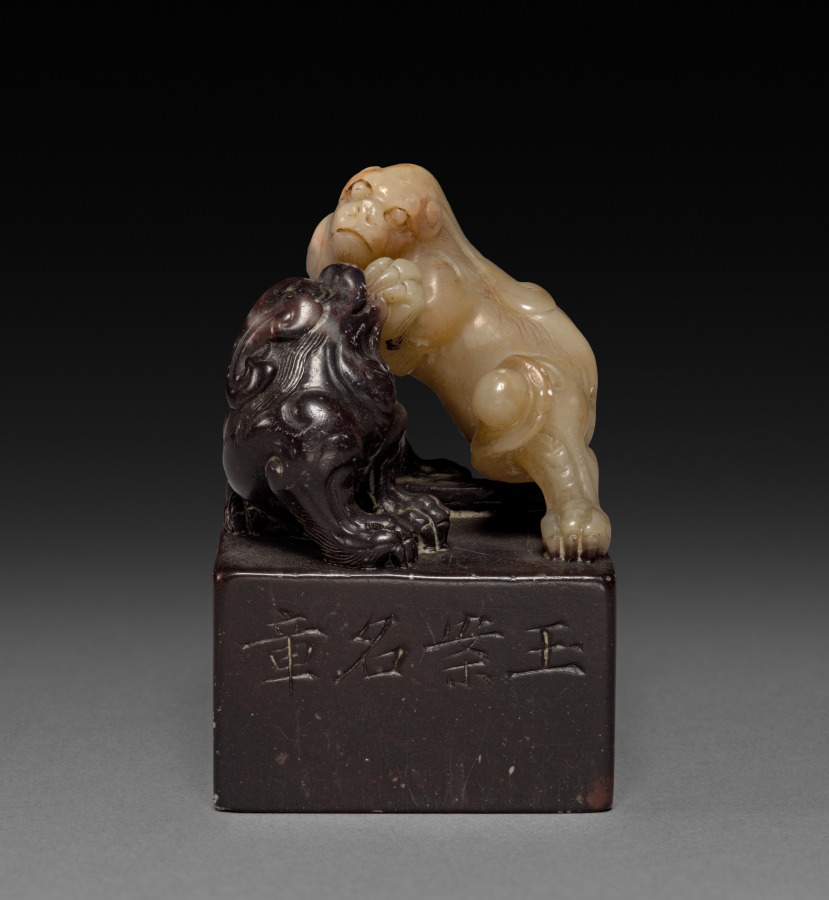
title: Seal with Two Qilin Playing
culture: China, Qing dynasty (1644-1911)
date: 1849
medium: onyx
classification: Stone